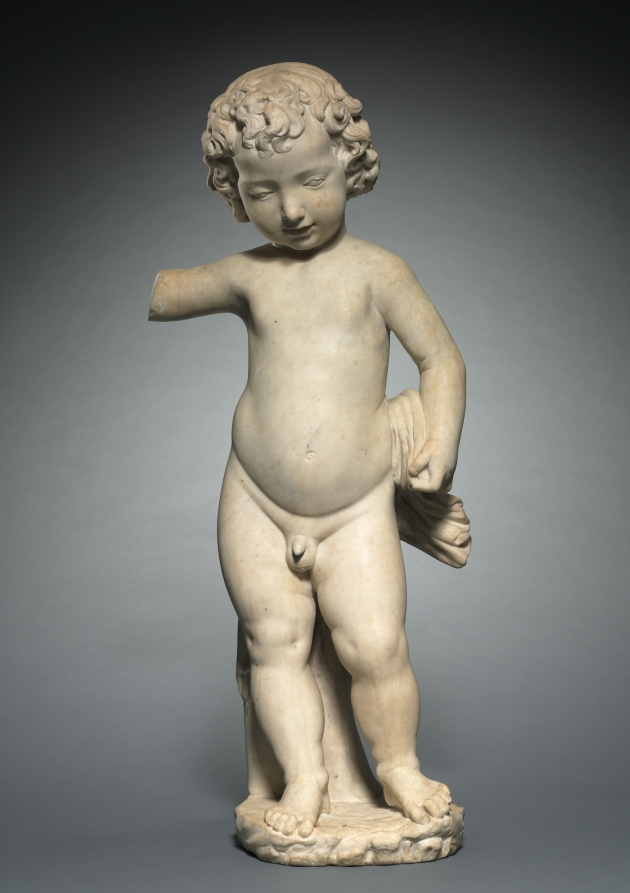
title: Christ Child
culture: Italy, Florence, 15th century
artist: attributed to Michele (di Luca) Marini (Italian)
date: c. 1490–1500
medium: marble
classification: Sculpture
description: This sculpture is an enlarged version of Desiderio da Settignano's figure of about 1460 at the top of his tabernacle in the Church of San Lorenzo in Florence. There are many replicas of Desiderio's work. This example is an especially fine one, undoubtedly intended for the interior of a church.